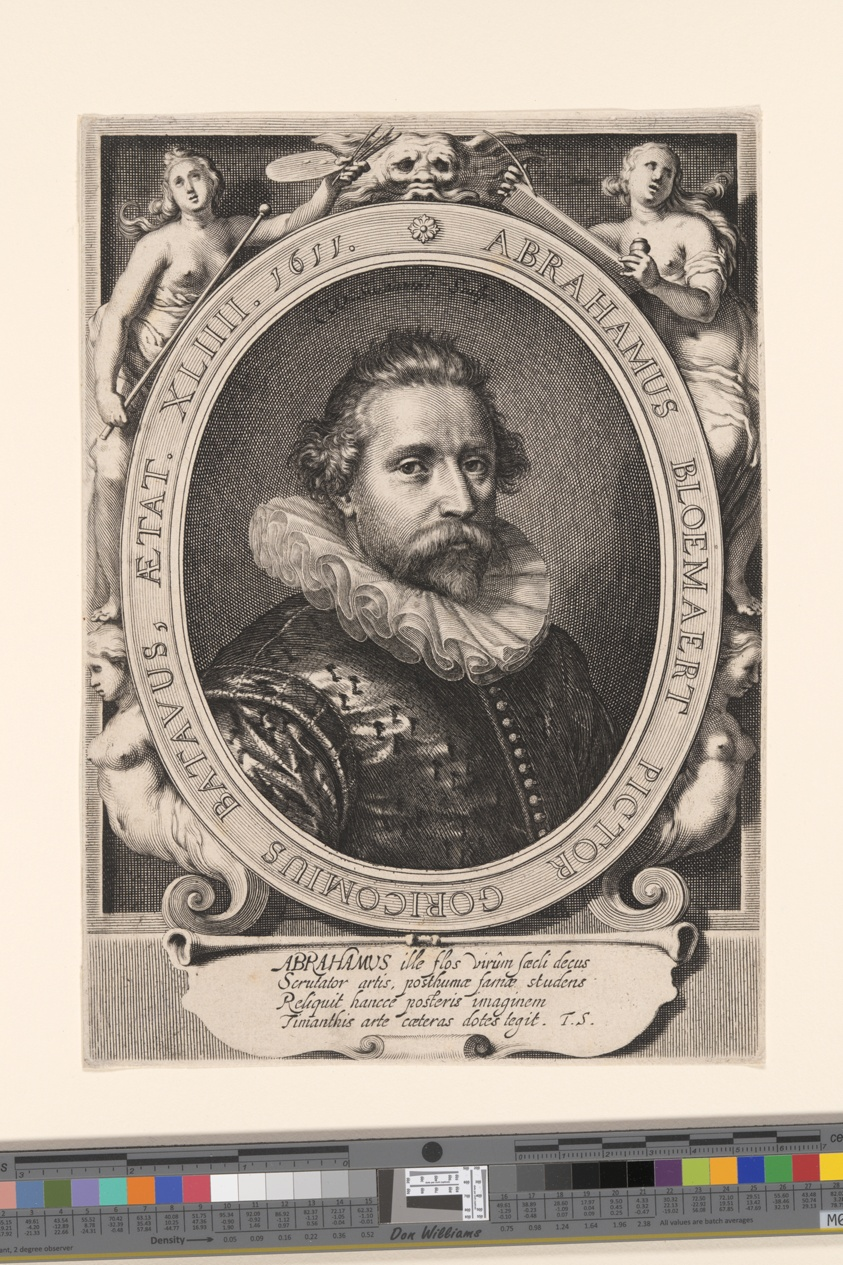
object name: Print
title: Portrait of Abraham Bloemaert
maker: Willem Isaacsz. van Swanenburgh; Dutch, 1580–1612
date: 1611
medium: Engraving on paper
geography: Netherlands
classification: engraving; paper; print; prints and drawing